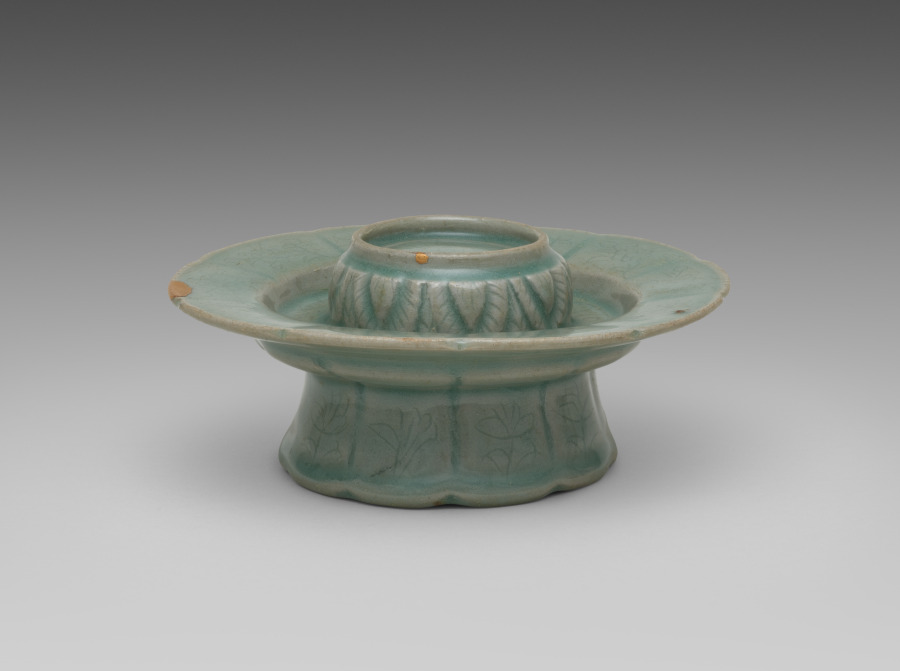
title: Floral-shaped Cup Stand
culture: Korea, Goryeo dynasty (918–1392)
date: 1100s-1200s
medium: celadon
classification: Ceramic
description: As early as the seventh century, the practice of drinking tea became an important part of elite culture in Korea. In enjoying teas, elites commissioned a variety of types of utensils and vessels including this delicate-looking cup stand, not only to make their tea-drinking experience more exciting, but also to show their refined taste.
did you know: According to a historical record, the cultivation of tea in Korea was initiated with green tea plant seeds from China by royal order in 828.